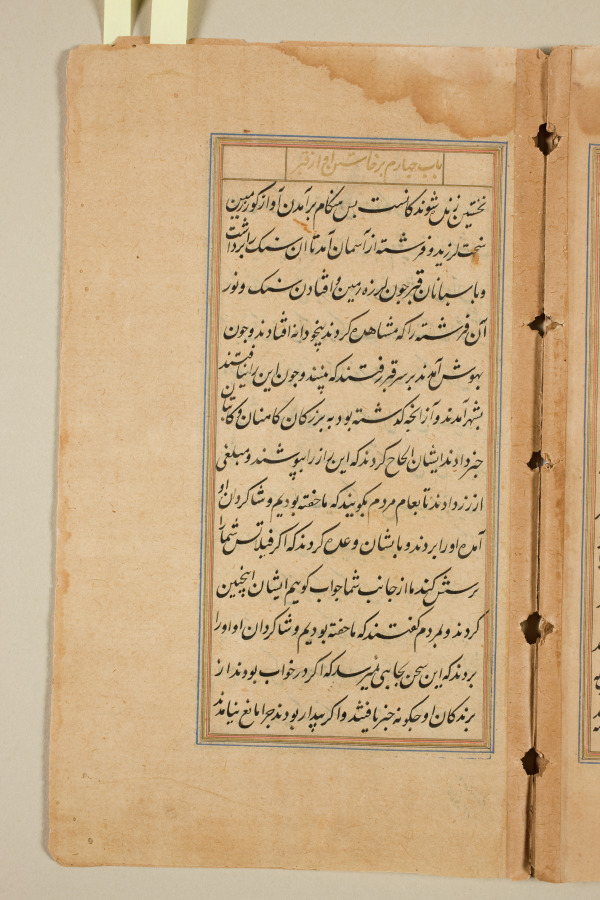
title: Text page from a Mirror of Holiness (Mir’at al-quds) of Father Jerome Xavier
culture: Mughal India, Allahabad, made for Prince Salim (1569–1627)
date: 1602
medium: Ink and gold on paper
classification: Manuscript